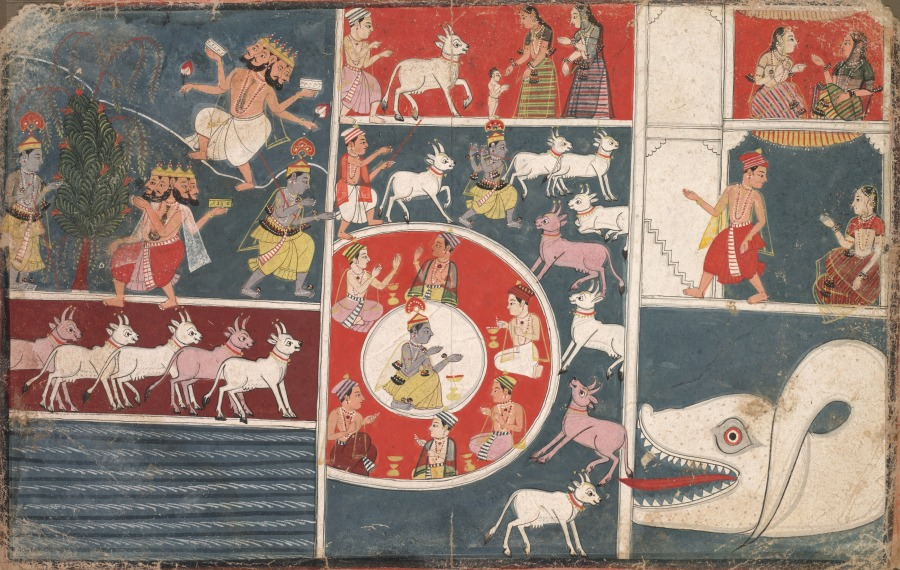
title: Krishna Playing the Flute and other Episodes from the Bhagavata Purana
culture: India, Rajasthan, Malwa school, 17th century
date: c. 1650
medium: Gum tempera and ink on paper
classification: Painting